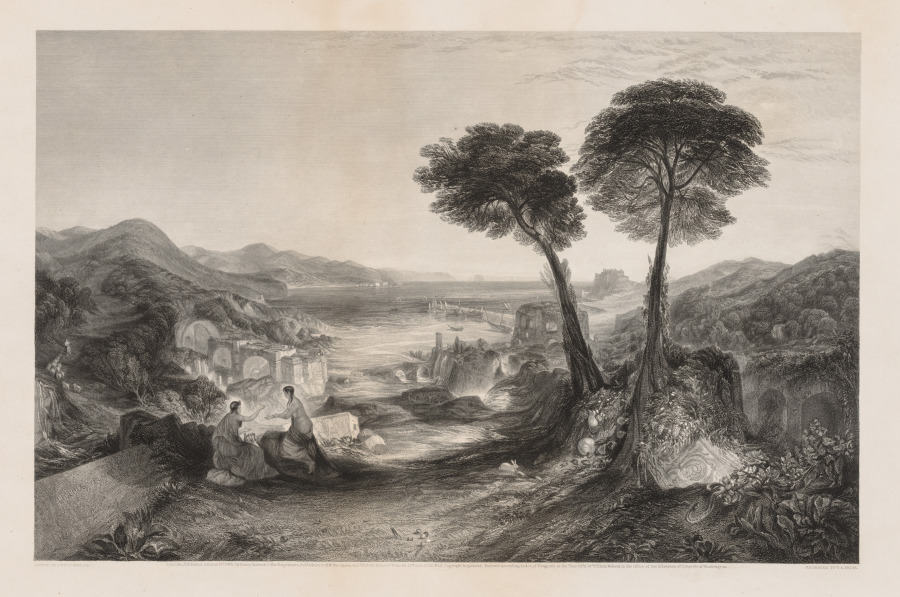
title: The Bay of Baiae, Apollo and the Sibyl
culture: England, 19th century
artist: Thomas Abiel Prior (British, 1809–1886)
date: 1873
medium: engraving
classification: Print